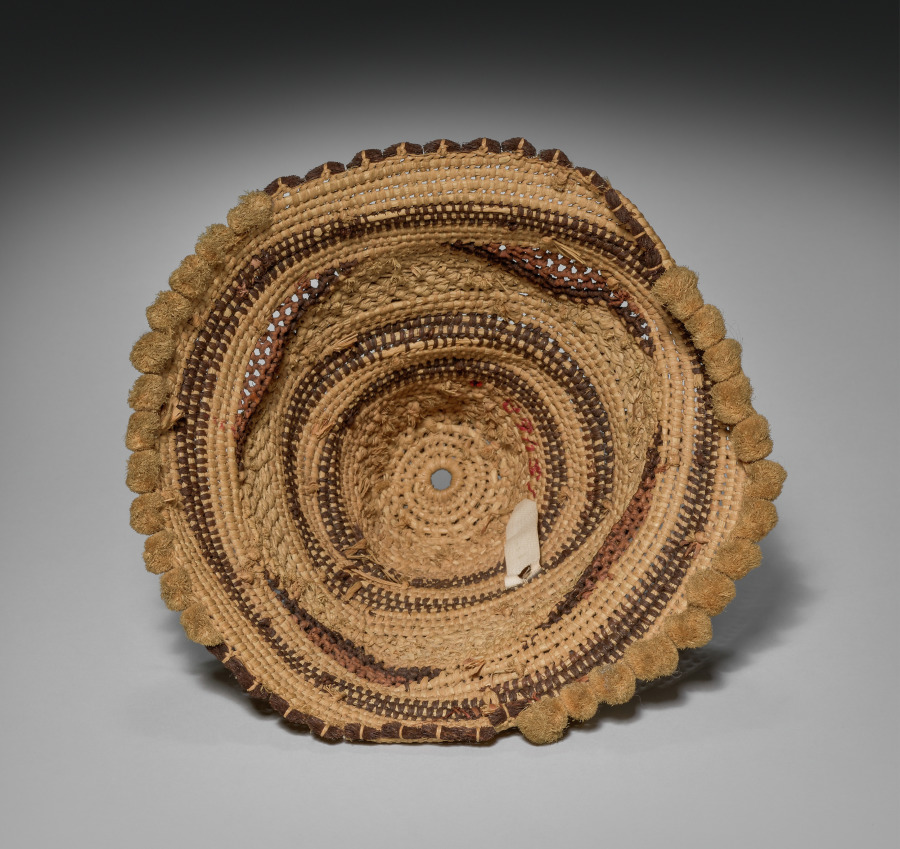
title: Hat with Pin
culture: Africa, Central Africa, Democratic Republic of the Congo, Kuba-style maker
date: early 1900s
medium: Raffia and dye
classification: Garment